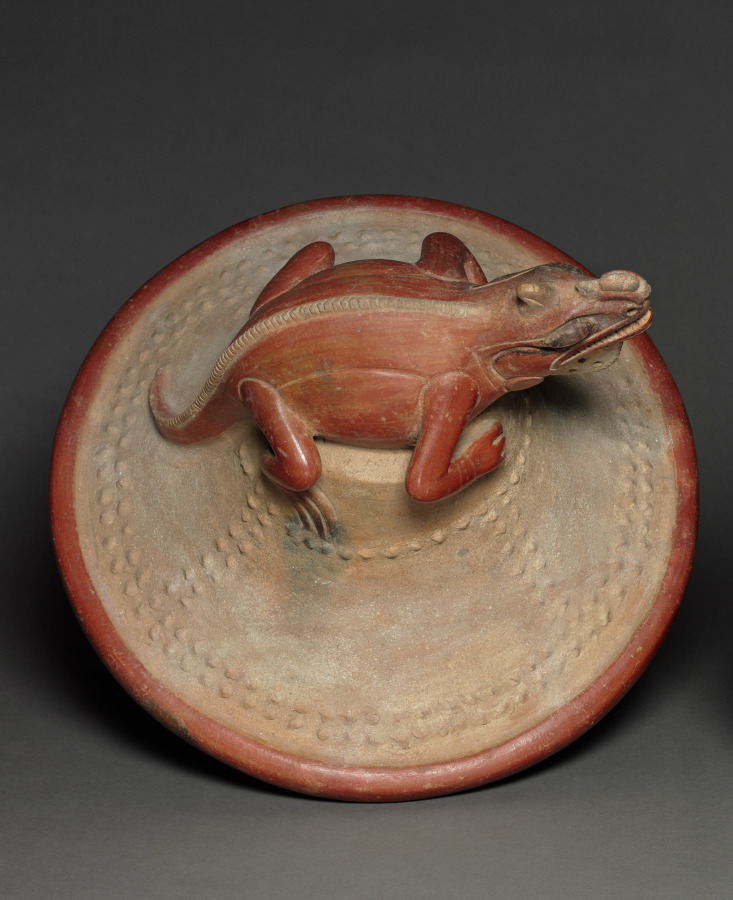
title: Lid of Bowl with Iguana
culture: Costa Rica, Southern Nicoya region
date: c. 600–1100 (Thermoluminescence date, 995–1395)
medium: ceramic, slip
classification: Ceramic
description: At the time of the Spanish conquest in the 16th century, Costa Rican mythology linked iguanas to the sky and to rulers. The earlier makers of this vessel left no written records, but they may have had similar beliefs. The lizard poses as though basking in the sun, a celestial body, and assumes an aggressive stance that could be likened to a ruler's: the teeth and chin under the dewlap are displayed, Also, fine ceramics like this were buried in the graves of the high-status dead, some of them certainly leaders of the several groups that competed in the area.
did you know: Green iguanas can grow to be over 6 feet long.